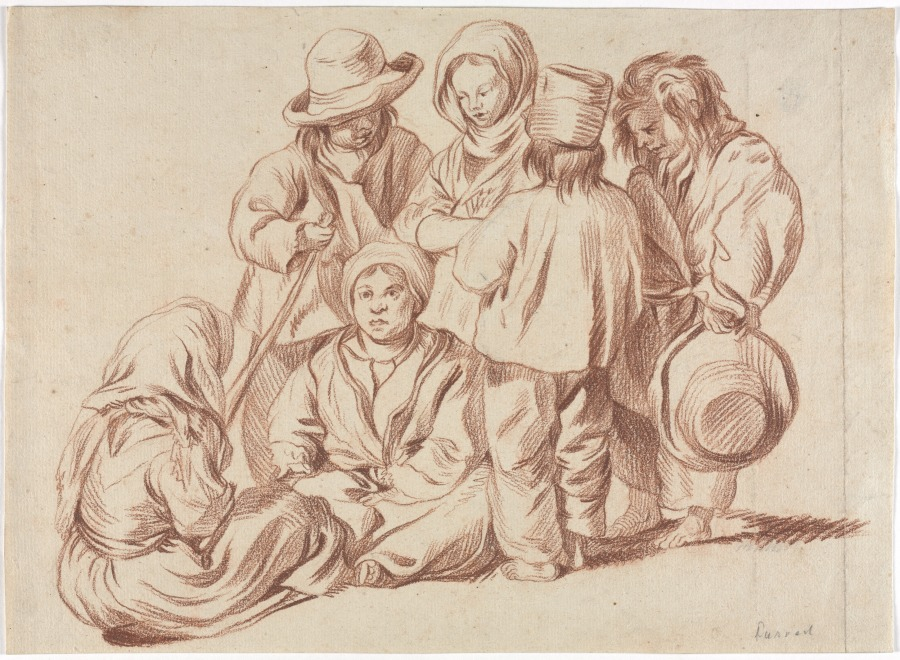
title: Group of Six Children (recto); Sketch of a Village (verso)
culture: France, 18th century (?)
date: 1700s(?)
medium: red crayon over traces of black chalk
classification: Drawing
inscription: lower right, in graphite: Du[illegible]